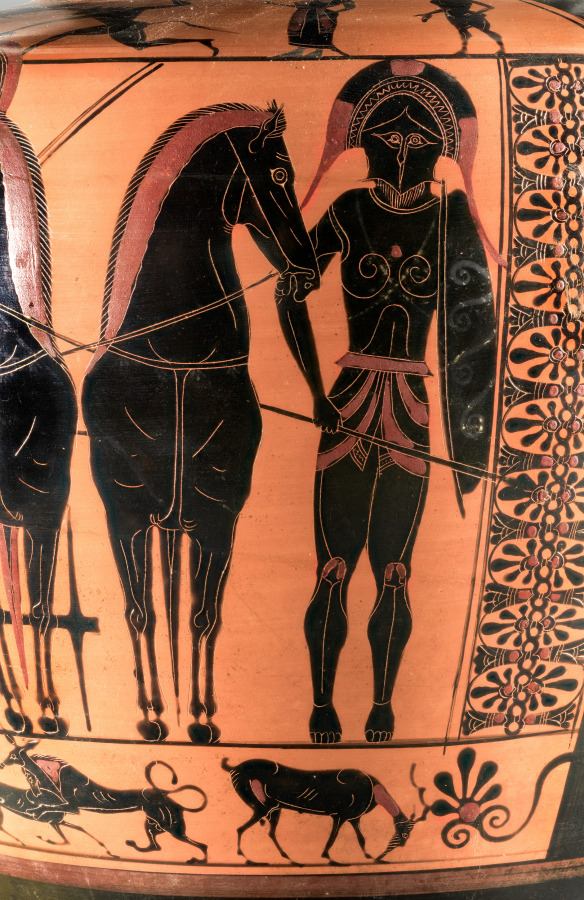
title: Black-Figure Hydria (Water Vessel): Frontal Quadriga (Body); Theseus and Minotaur (Shoulder)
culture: Greece, Attic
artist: attributed to Antimenes Painter (Greek, Attic, active c. 530–510 BCE)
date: c. 520 BCE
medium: ceramic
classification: Ceramic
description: Although their subjects differ, the three fields of figured decoration on this vessel relate to one another metaphorically through the theme of victory. Just as Theseus defeats the Minotaur on the shoulder, two lions converge on a deer in the predella (the small, lowermost panel). In the largest panel, victory is still to come, presumably for all three warriors shown: one in the chariot behind his driver, and one on foot on either side. Somewhat unusually, two of the warriors look directly out at the viewer, their frontal faces an interesting complement to the much more common frontal chariot.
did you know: This type of water vessel, a hydria, takes its name from hudor, Greek for water (and still familiar in the English root hydro).